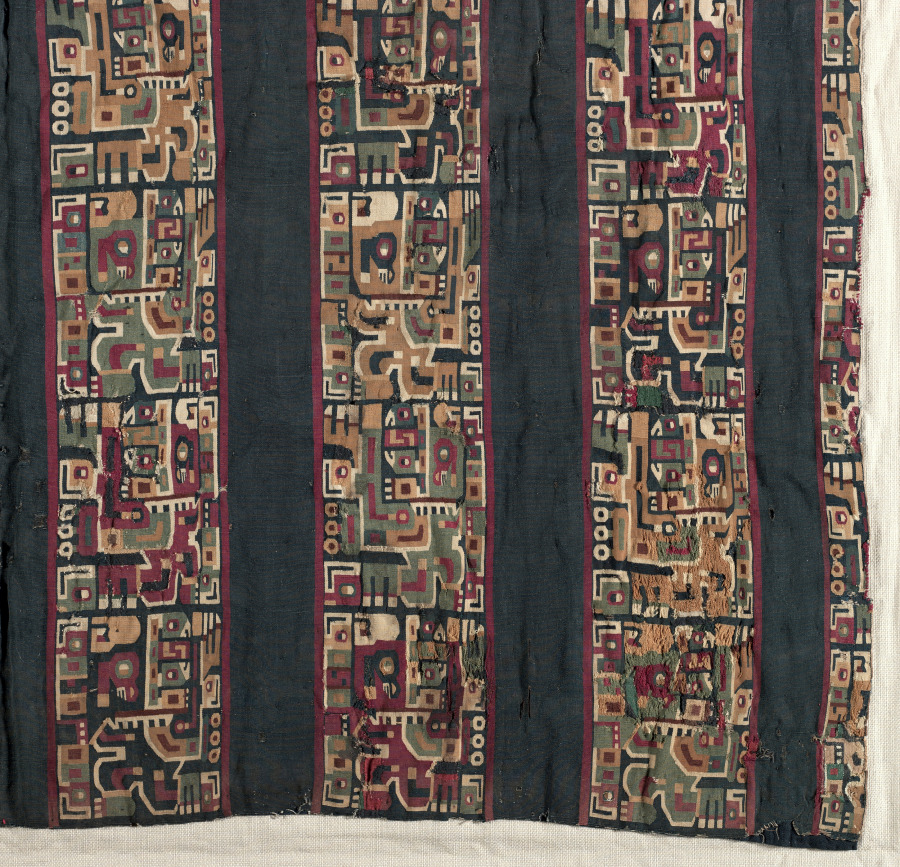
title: Half of a Sleeved Tunic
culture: Central Andes, Middle Horizon, Wari, 6th-11th century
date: c. 500–1000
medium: single-interlocked tapestry; cotton warp; camelid fiber weft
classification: Textile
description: The bird-headed creature in profile that repeats in each of this tunic's design fields gazes upward, holds a staff of authority in front of its body, and wears an ornate headdress behind which a three-feathered wing can be seen. The extremely high technical quality of such tunics suggests that the Wari reserved bird imagery for their most exalted rulers. Here, the original incorporated more than twice as much yarn as the routine--some 19 miles, all handmade and much dyed an inky, dark blue, the most prestigious of Wari colors.